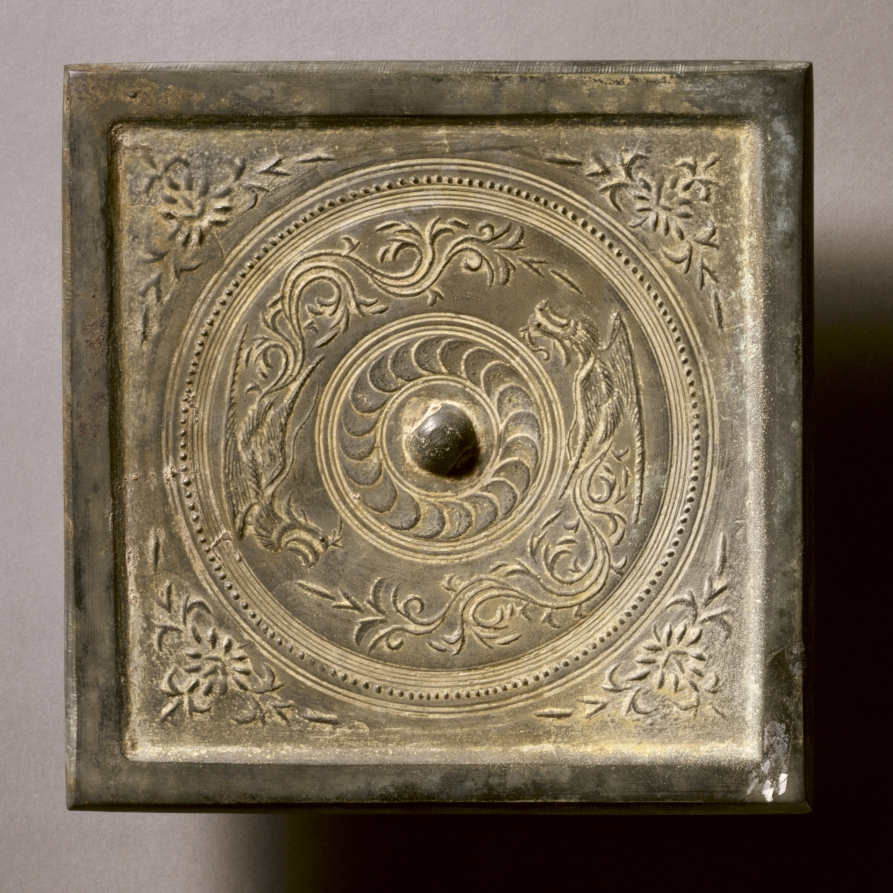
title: Square Mirror with Two Phoenixes and Floral Sprays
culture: China, Northern Song dynasty (960-1127)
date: 960–1127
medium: bronze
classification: Metalwork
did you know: The Chinese phoenix is known as Fenghuang, mythological birds in East Asian mythology that reign over all other birds.